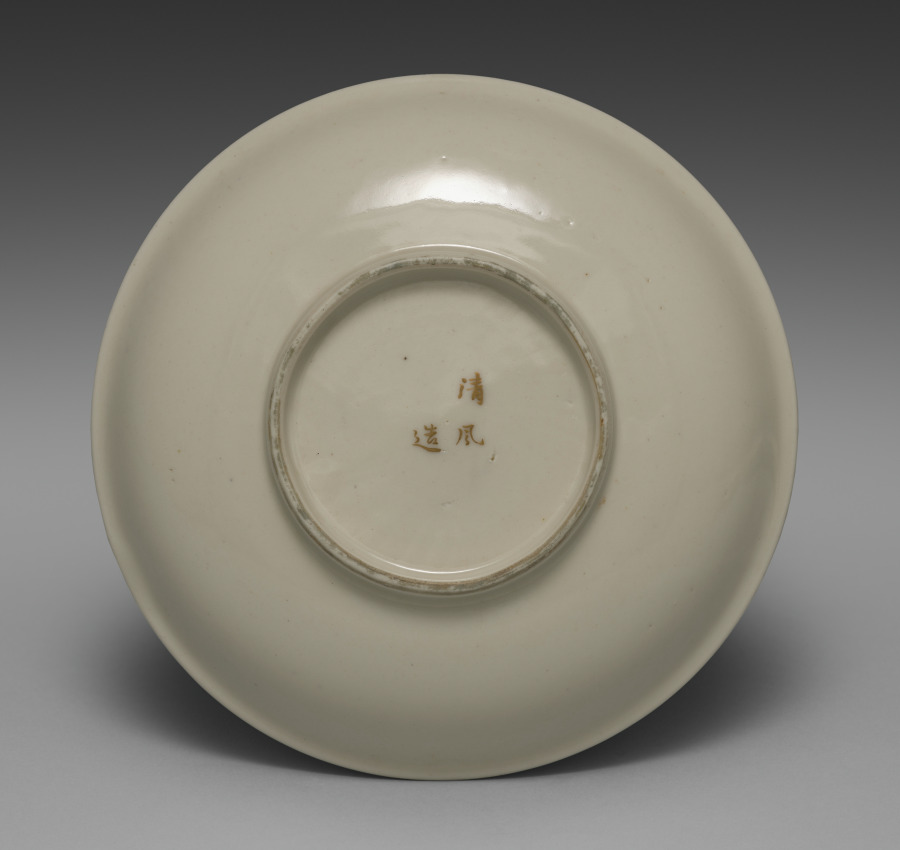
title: Medium-sized Dish from Dining Set with Plum Blossoms and Cracked-Ice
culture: Japan, Meiji period (1868–1912)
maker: Seifū Yohei II (Japanese, 1844–1878)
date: c. 1875–78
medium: Porcelain with molded designs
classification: Ceramic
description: Each item in this set has a delicate low-relief design of flowering plum branches over scattered, intersecting lines meant to resemble the cracked-ice surface of a frozen body of water and is signed on the base in gold pigment. While Yohei II produced many fine works in underglaze blue, like those produced by Kiyomizu Shichibei, he also made works in quite different styles later in his career, from the early 1870 s. In 1873, he was appointed purveyor to the Industrial Center of Kyoto Prefecture, a designation associated with Kyoto’s efforts to reach an international market through the port of Kobe; and from 1875 until his death, he was involved in national-level projects to present Japanese ceramics across the world. It was during this period that Yohei III was apprenticed to Yohei II, and it has been suggested that this set may in fact be an early example of Yohei III’s work, which he signed with his teacher’s name. Decorated with flowers resembling Japanese textile motifs, the set calls to mind the design of Yohei II’s pair of vases with plum blossoms in the Victoria and Albert Museum. Here, the elaborate trees created for a formal public exhibition setting have been translated into the approachable blossoms of the genteel domestic environment. While the designs are consistent across the pieces, each raised flower petal and pistil and each incised line in the ice was done by hand, so the cups, bowls, and dishes are similar yet unique. The bottoms of two boxes once identified the set’s owner, but the information has been deliberately obscured with black ink. However, inscriptions still visible appear to indicate two occasions, once at the end of July 1886 , and once again in June 1916 , when parts of the set were requested from Hokura in Niigata Prefecture. The location corresponds to a neighborhood in the present-day city of Jōetsu. The surname Tsuji 辻 also appears on a paper tag affixed to one of the box cloths. Future research may possibly reveal more about their provenance. A vase by Yohei III in a private collection combines the formal grandeur of the Yohei II vases in the Victoria and Albert Museum with the gentler design of this dining set, placing flowering plum trees against soft, scalloped-edge clouds resembling those in golden screens.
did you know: The dining wares have a creamy white coloration that the four boxes containing them identify as Korean in style.